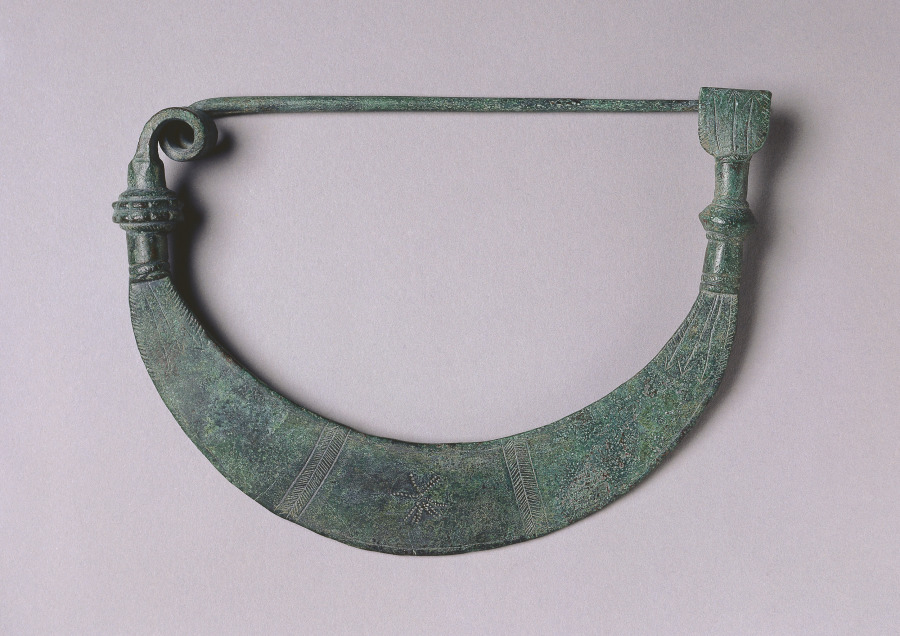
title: Fibula with Solar Design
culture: Greece, Boeotia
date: c. 700–675 BCE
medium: bronze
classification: Metalwork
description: The crescent body of this bronze fibula (brooch) features both incised and punched decoration. Three sets of three arrows have been interpreted as indicating the daily route of the sun, shown at the arc’s center as a series of radiating punch marks within a shallowly incised circle. When worn, the arc may have hung downward, a large ornamental addition to the functional pin used to secure its wearer’s clothing.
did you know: A fibula is an ancient safety pin that held garments in place.